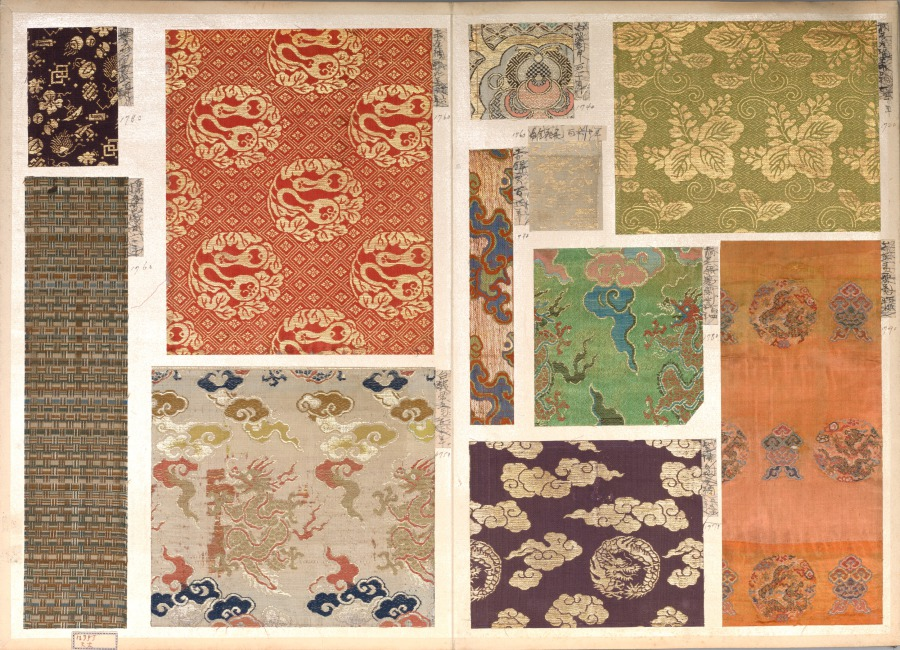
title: Album of Textile Samples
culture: Japan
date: 1790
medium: silk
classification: Textile